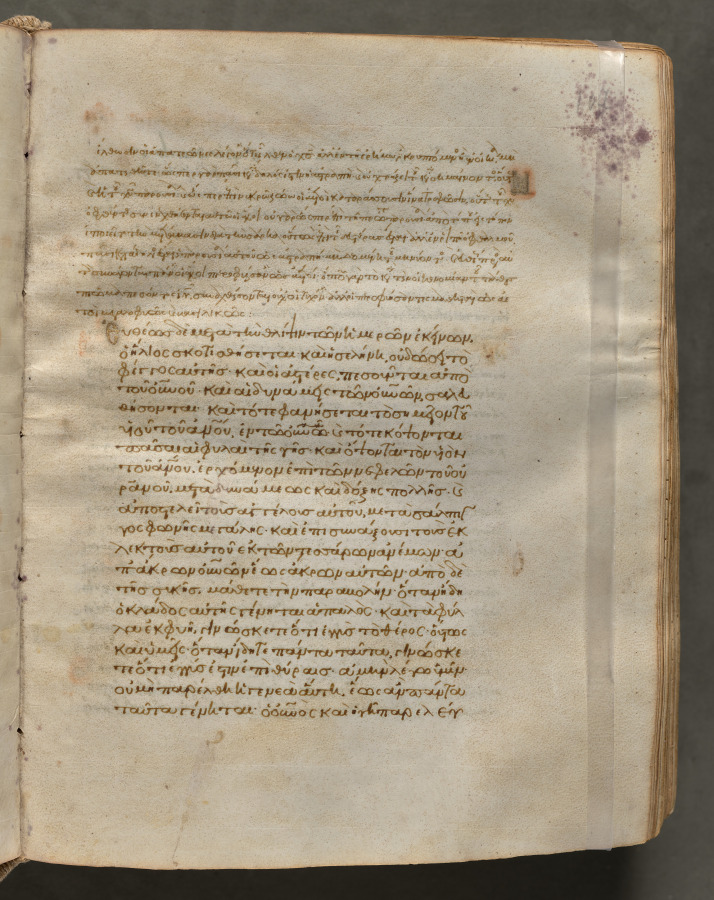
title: Text, folio 107 (recto), from a Gospel Book with Commentaries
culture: Byzantium, Constantinople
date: c. 1000–1100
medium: ink, tempera, and gold on vellum; leather binding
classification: Bound Volume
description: Each of the four gospels in this book opens on a page with brilliantly illuminated borders depicting the author of the text as well as birds-principally peacocks, symbols of the immortality of the soul-and fountains, representing the fountain of life and the salvation of the soul. This volume consists of 428 leaves with texts in Greek. Its level of sophistication suggests that it was probably written and decorated in a monastery in Constantinople.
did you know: Gospel Books were carried in procession through Byzantine churches.